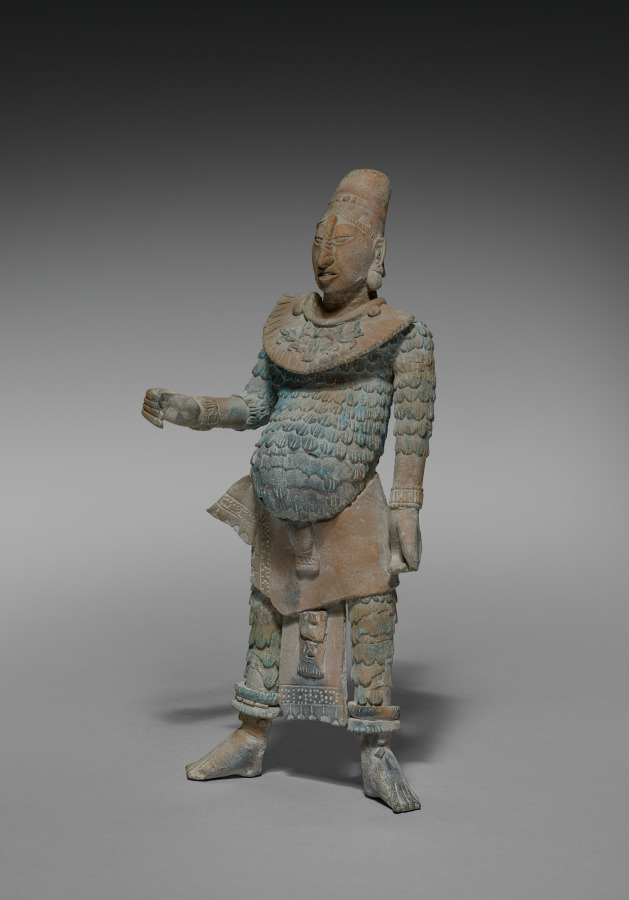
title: Warrior Figurine with Removable Headdress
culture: Mexico, Yucatán, Jaina Island region, Campeche, Maya style (250-900)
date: 600–900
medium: earthenware with pigment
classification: Sculpture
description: The major offerings placed in the Maya graves of Jaina Island were ceramic figurines, some of Mesoamerica's finest, that depict deities and humans in a variety of roles. This warrior, his headdress removable, once probably held weapons and wears either quilted cotton armor or the feathered uniform of a military order. We don't know why such figures are often pot-bellied.